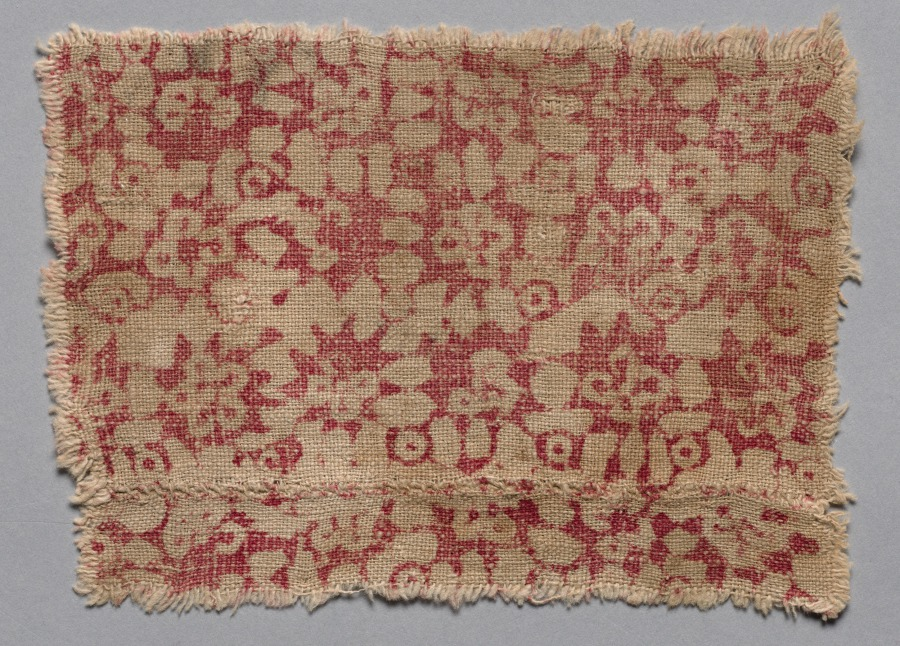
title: Fragment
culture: India, 12th-14th century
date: 1100s - 1300s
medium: woodblock print on cotton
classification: Textile